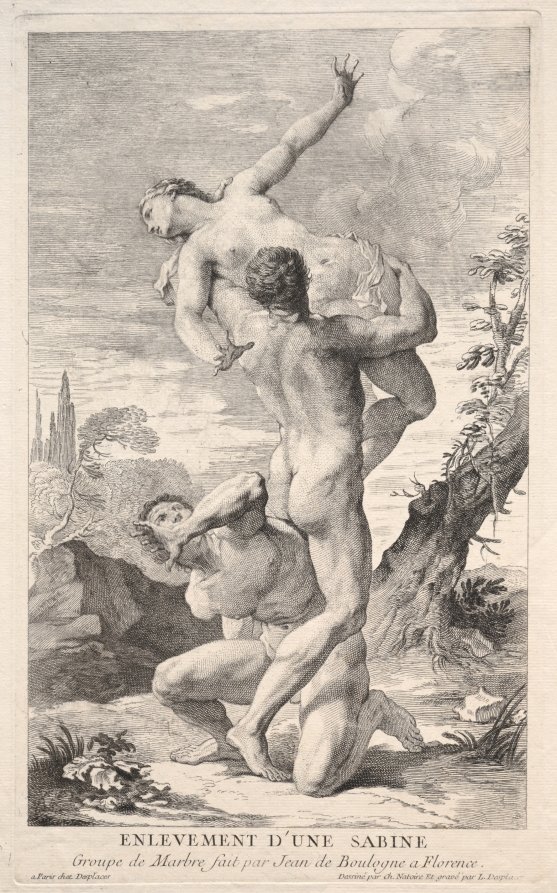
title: Rape of the Sabines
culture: France, 18th century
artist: Louis Desplaces (French, 1682–1739)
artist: after Charles Joseph Natoire (French, 1700–1777)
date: 1700s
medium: engraving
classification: Print